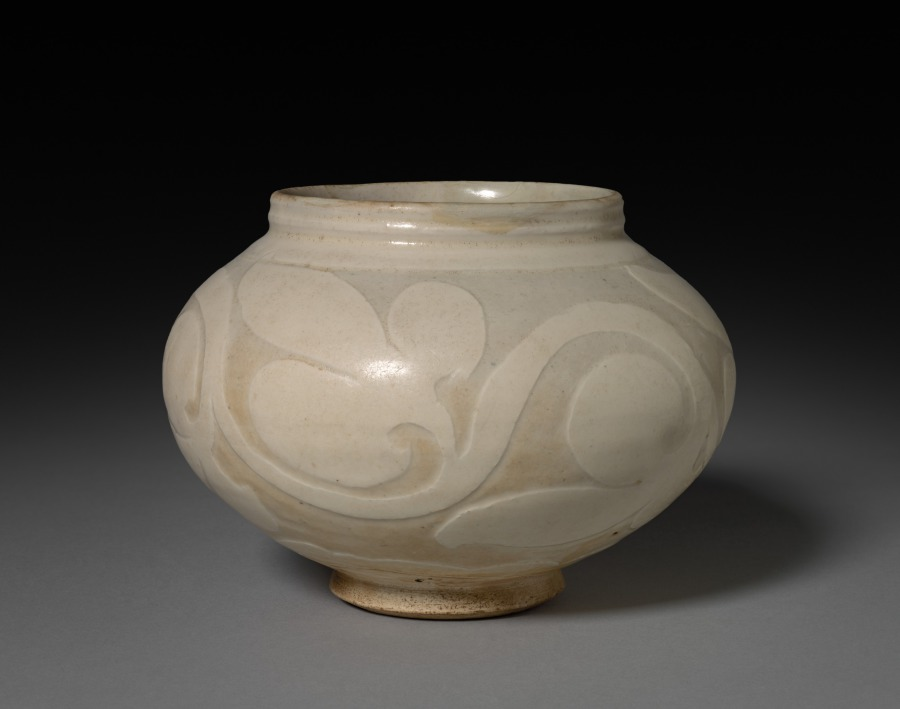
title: Jar: Cizhou ware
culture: China, Northern Song dynasty (960-1127) - Jin dynasty (1115-1234)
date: 12th-13th Century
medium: glazed light gray stoneware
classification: Ceramic